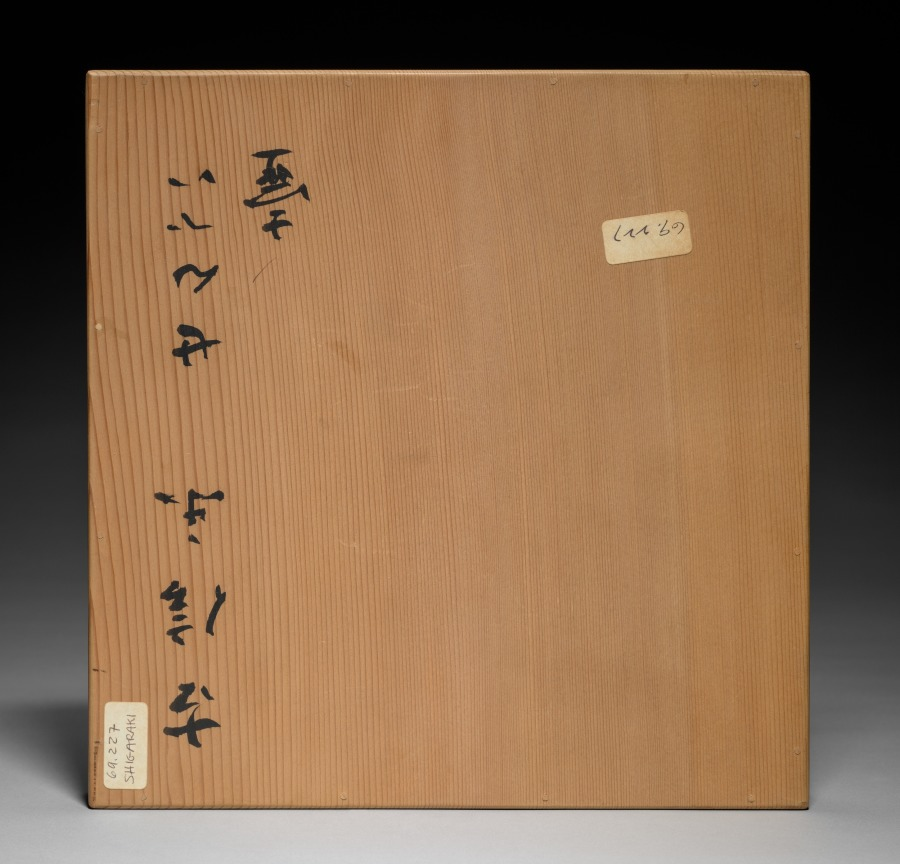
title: Tea Storage Jar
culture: Japan, Momoyama period (1573–1615)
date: 1573–1615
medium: glazed stoneware (Shigaraki ware)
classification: Ceramic